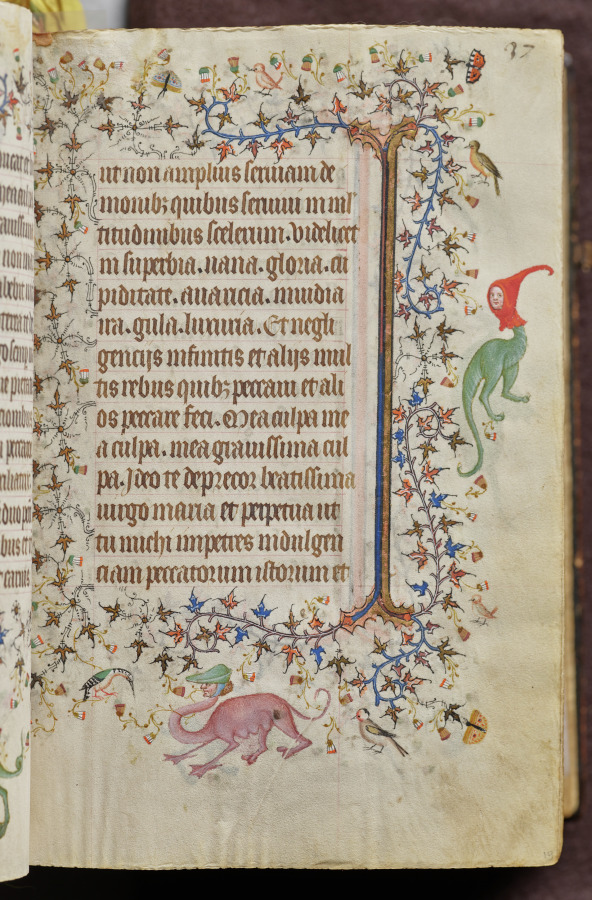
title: Hours of Charles the Noble, King of Navarre (1361-1425): fol. 19r, Text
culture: France, Paris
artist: Master of the Brussels Initials and Associates (French)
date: c. 1405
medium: ink, tempera, and gold on vellum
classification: Bound Volume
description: This precious book was highly prized by its owner, Charles III, King of Navarre, a French-born prince whose coat of arms is painted on 20 folios. Charles visited Paris on numerous occasions and likely acquired this volume there in 1404. Paris was the center of the European book trade at the time and attracted illuminators from many parts of Europe. This manuscript represents one of the most remarkable fusions of French and Italian taste in book illumination. Though conforming to Parisian standards, most of the book’s major miniatures are the work of the Brussels Initials Master, an Italian illuminator who previously worked in Bologna and Padua.